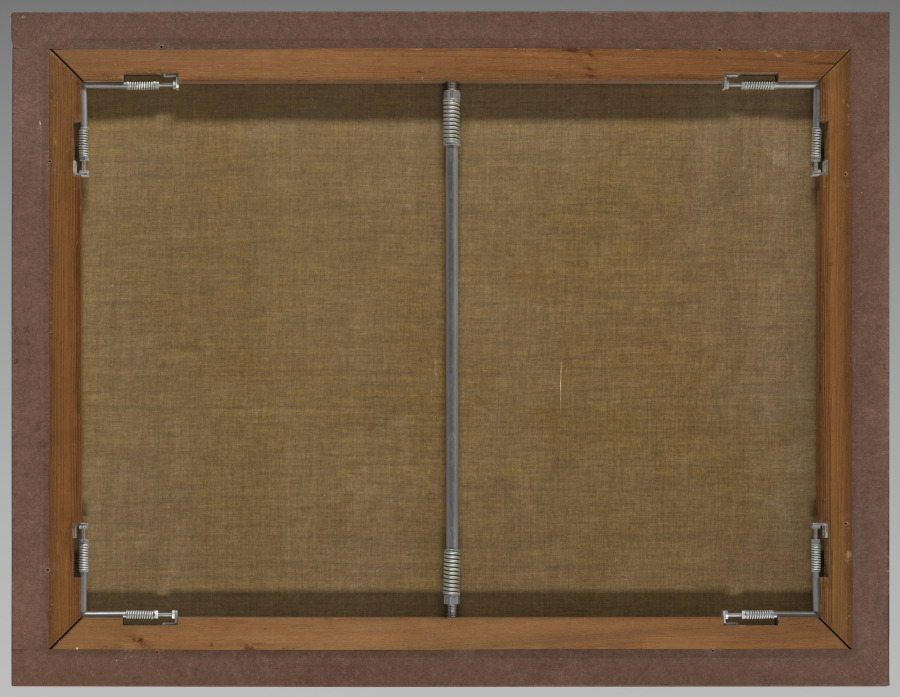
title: Maine Coast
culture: America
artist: Rockwell Kent (American, 1882–1971)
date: 1907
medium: oil on canvas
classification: Painting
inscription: signed lower left: Rockwell Kent / 1907.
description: Located off the coast of Maine, Monhegan Island has long drawn artists attracted to its rugged headlands, brooding forests, and dramatic ocean vistas. Unlike most colleagues who visited during summer, Kent built a home and lived there year-round, working as a well digger, lobsterman, and carpenter from 1906–8. This boldly rendered winter scene was painted from his studio window.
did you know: Kent loved to paint landscapes in cold, remote areas, including Maine, Alaska, Newfoundland, and Greenland.